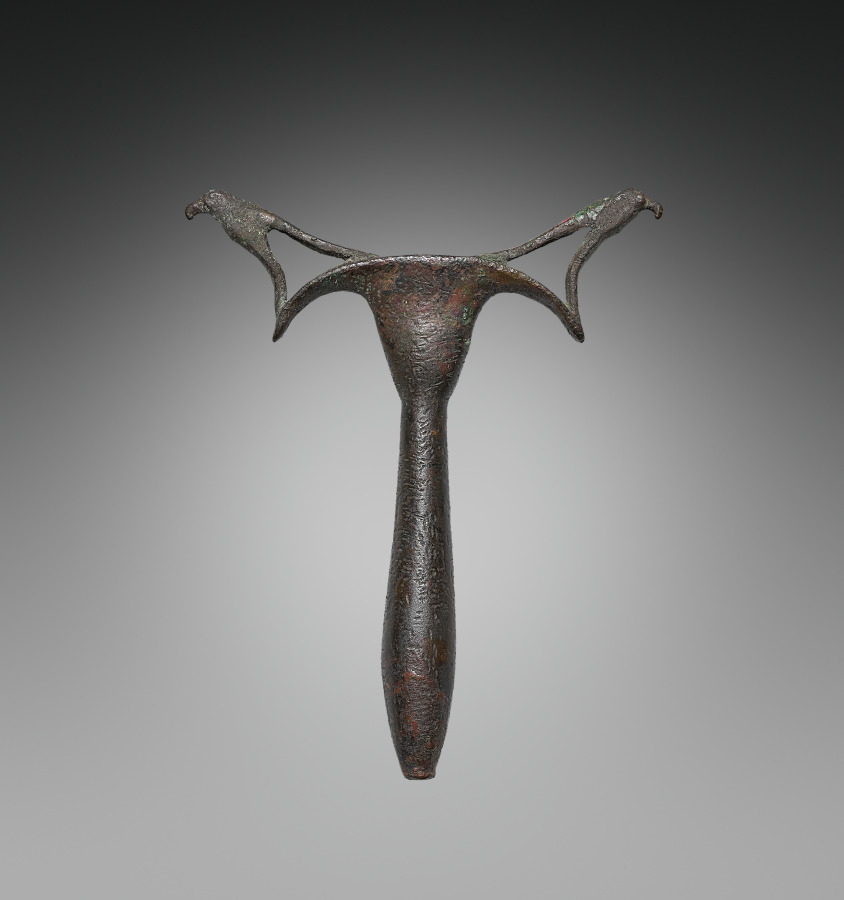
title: Mirror with Falcons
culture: Egypt, New Kingdom (1540–1069 BCE), Dynasty 18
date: 1540–1296 BCE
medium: mirror of copper, handle of tin-bronze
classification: Cosmetic Objects